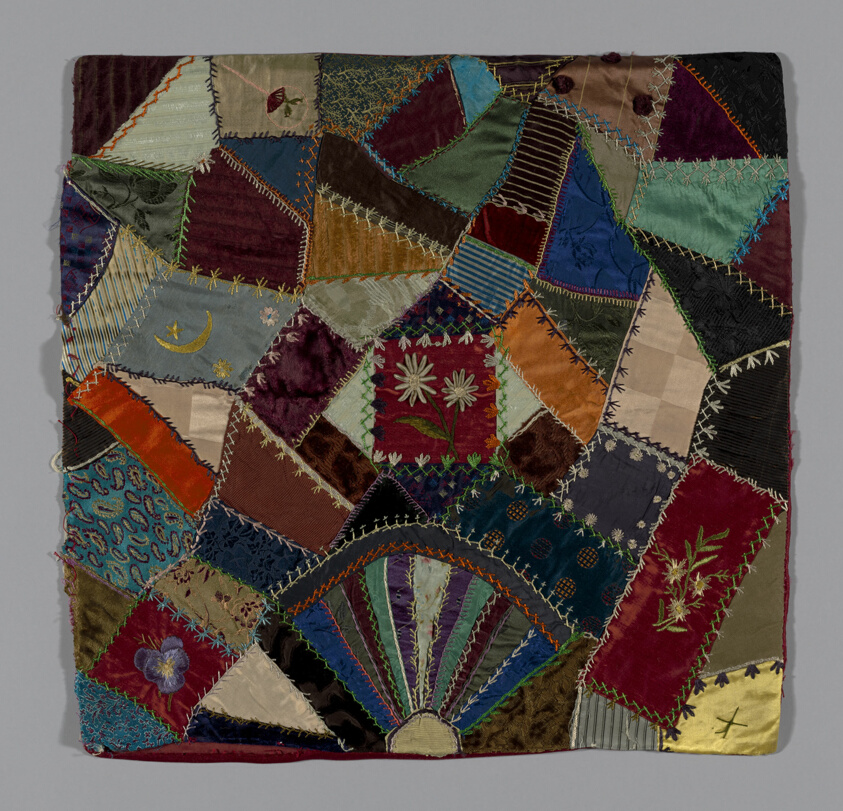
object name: Textile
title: Fragment from Bedcover (Crazy Quilt Block)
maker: United States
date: c. 1884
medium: Silk, in a variety of weaves including cut velvet weave; pieced; embroidered in silk threads in a variety of stitches; backed with cotton, plain weave; lined with silk, satin weave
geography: United States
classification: needlework - quilt; textile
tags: zigzags, paisley, stripes, floral, flowers, stars, moon